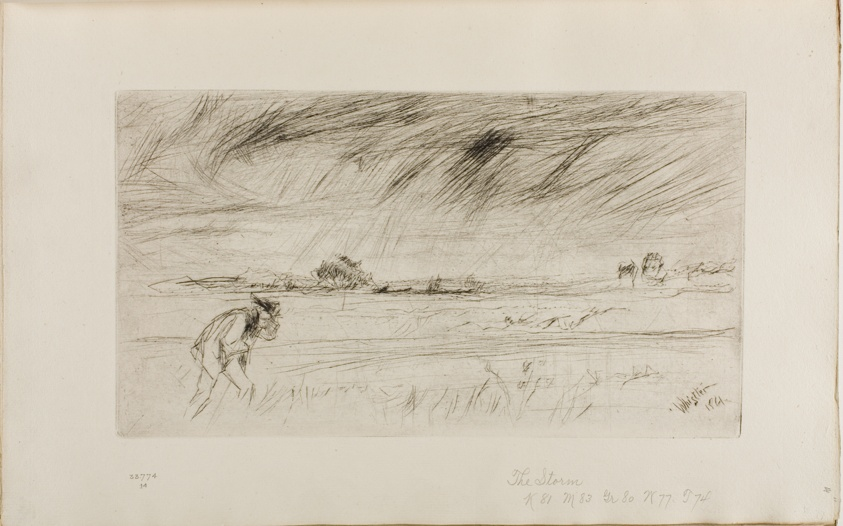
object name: Print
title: The Storm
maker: James McNeill Whistler (American, 1834-1903)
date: 1861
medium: Drypoint, with drypoint cancellation lines, in black ink on ivory laid paper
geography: United States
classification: drypoint; prints and drawing; book; print; paper